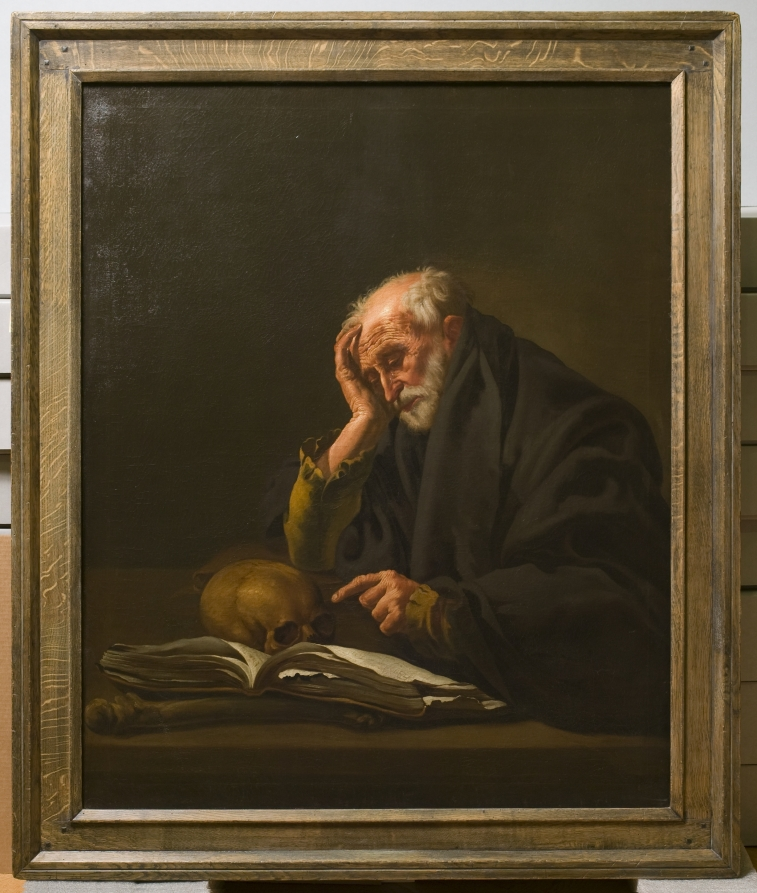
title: Saint Jerome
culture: Flanders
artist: Hendrick ter Brugghen (Dutch, 1588–1629)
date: c. 1621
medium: oil on canvas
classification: Painting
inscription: Signed and dated upside down on open book: "H TBrugghen 1621"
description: Not all subjects are easy to identify. This museum long thought that the subject was the Greek philosopher Heraclitus, largely because tears are part of the standard representation of this ancient thinker. However, ter Brugghen omits the other crucial key to identifying Heraclitus--a globe over which he weeps. Instead, the book and skull indicate that the figure is Saint Jerome, known for translating the Bible into Latin. The artist probably chose to show Jerome crying to intensify his penitence.